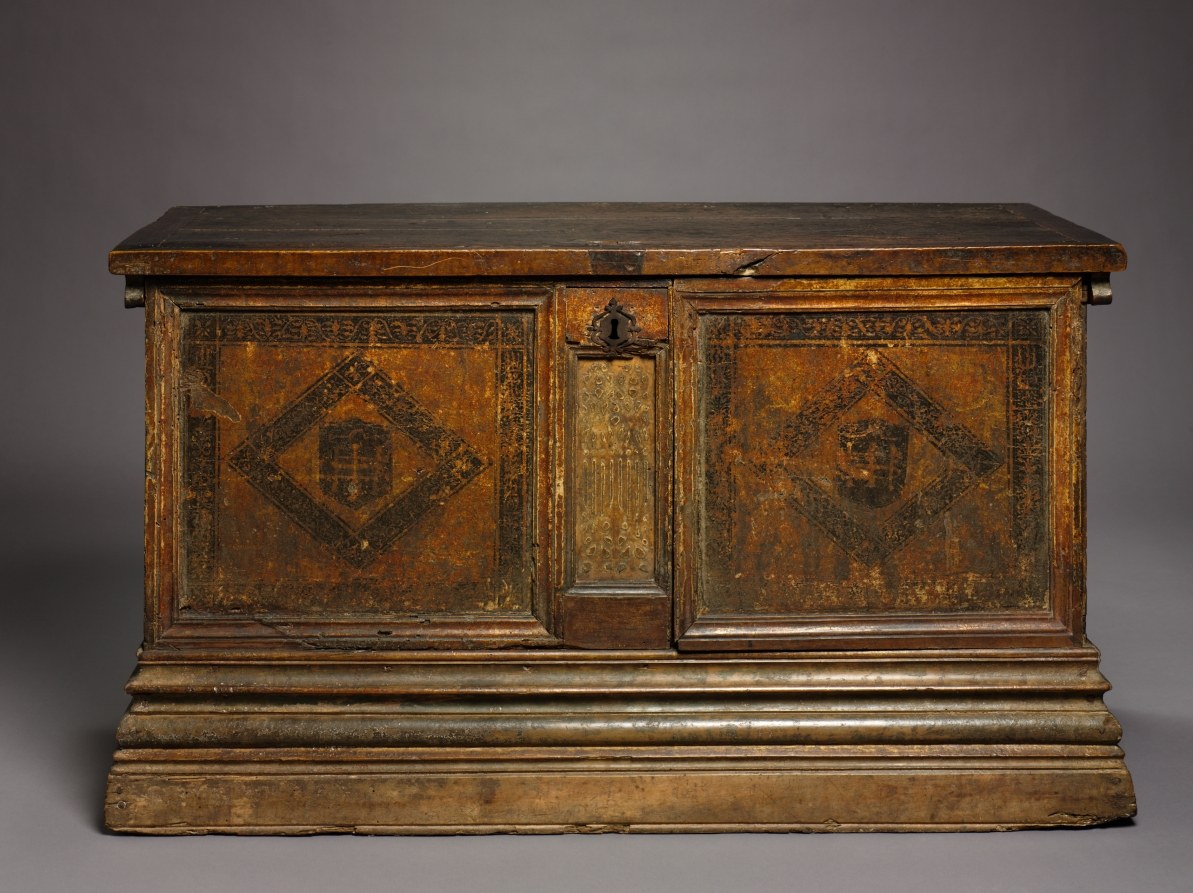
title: Gothic Marriage Chest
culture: Spain, Catalonia, Barcelona(?), 16th century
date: c. 1500–1525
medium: wood with painting and gilding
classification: Furniture and woodwork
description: These elaborately carved chests were given by husbands to their wives on the occasion of their wedding. Inside the home such chests were used for the storage of clothing and were elaborately painted and gilded. These chests are examples of a type produced in Barcelona from the late 1400s onward.